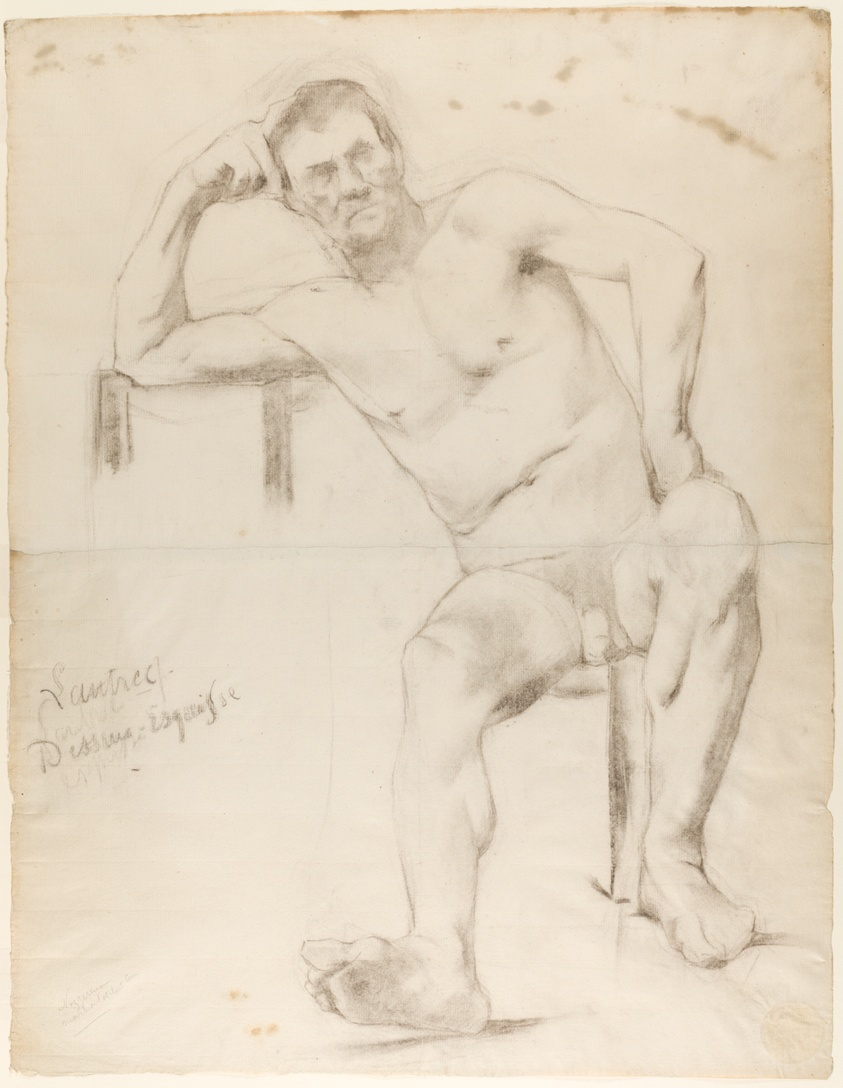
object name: Drawing and Watercolor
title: The Model Nizzavena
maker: Henri de Toulouse-Lautrec (French, 1864-1901)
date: c. 1882–1883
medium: Charcoal, with stumping, on cream laid paper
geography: France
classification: charcoal; drawings (visual works); prints and drawing